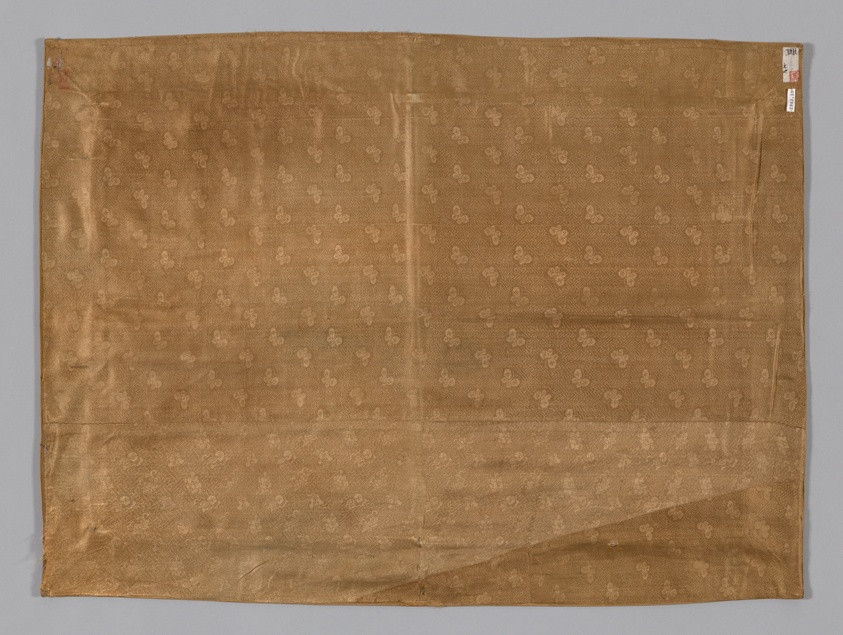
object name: Textile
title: Panel (Former Fragment of Man's Coat)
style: qing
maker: Manchu (China)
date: Qing dynasty(1644–1911), 1700/35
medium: Center: silk, slit tapestry weave with eccentric and interlaced outlining wefts; painted; border: silk, warp-float faced 5:1 satin weave with weft-float faced 1:2 twill interlacings of secondary binding warp-float faced 7:1 satin weave; lined with silk, 3:1 twill damask weave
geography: China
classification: textile; weaving